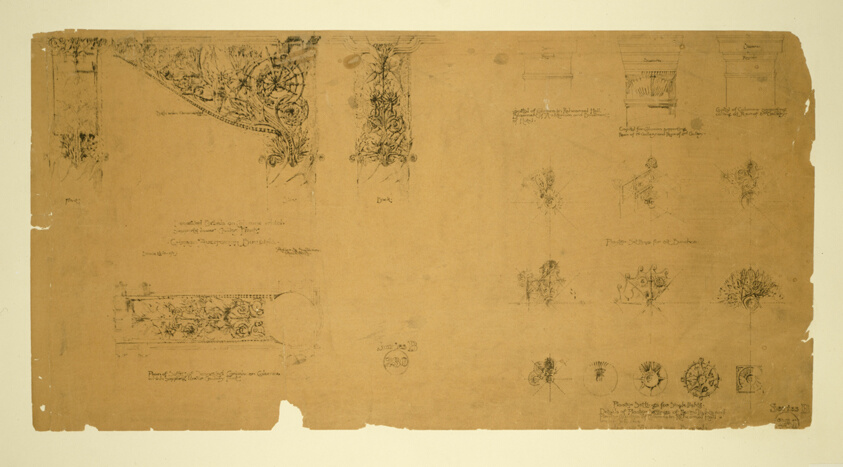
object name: Architectural Drawing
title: Auditorium Building, Chicago, Illinois, Plaster Details for Gallery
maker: Adler and Sullivan; American, 1883–1895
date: c. 1887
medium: Hectograph print on paper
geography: Chicago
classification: architectural drawing; architecture